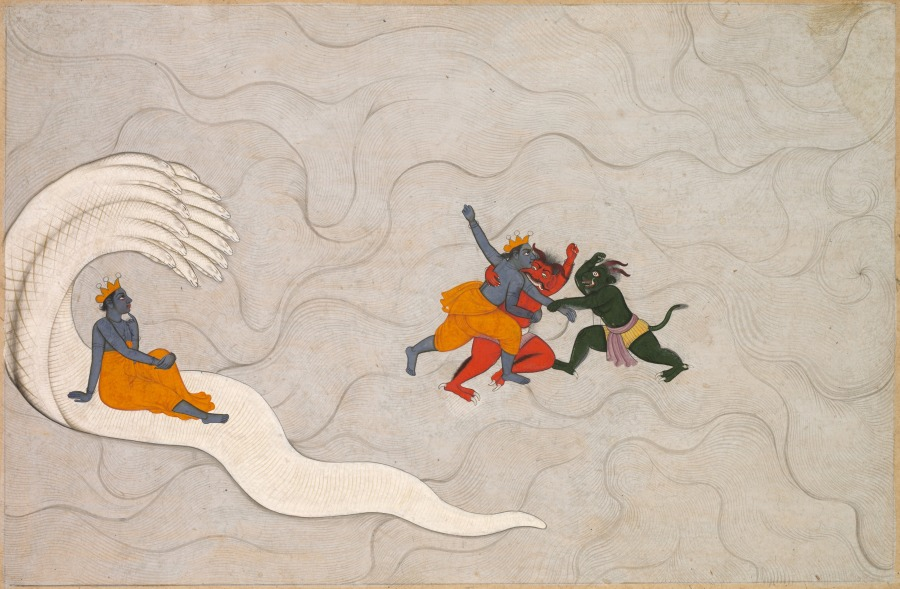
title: Vishnu Battles Madhu and Kaitabha, from a Markandeya Purana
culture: Northern India, Pahari kingdoms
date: c. 1760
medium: Gum tempera on paper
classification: Painting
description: This scene from a Hindu text is set during the moments before the creation of the world. The four-armed god Vishnu has just awakened on his multiheaded serpent bed that floats on the cosmic ocean of milk. Two demons generated from his earwax, according to the text, have already begun a primordial battle between good and evil. In the foothills of the western Himalayas there were numerous small kingdoms governed by rulers who paid tribute to the Mughal emperor. The rulers of these Pahari kingdoms, including Guler, began to sponsor workshops of court painters during the 1600s, following the model of the imperial Mughal atelier. Each court developed its own painting style; at Guler, unpopulated pale expanses offset the opaque hues of clustered figures delineated by smooth contour lines.